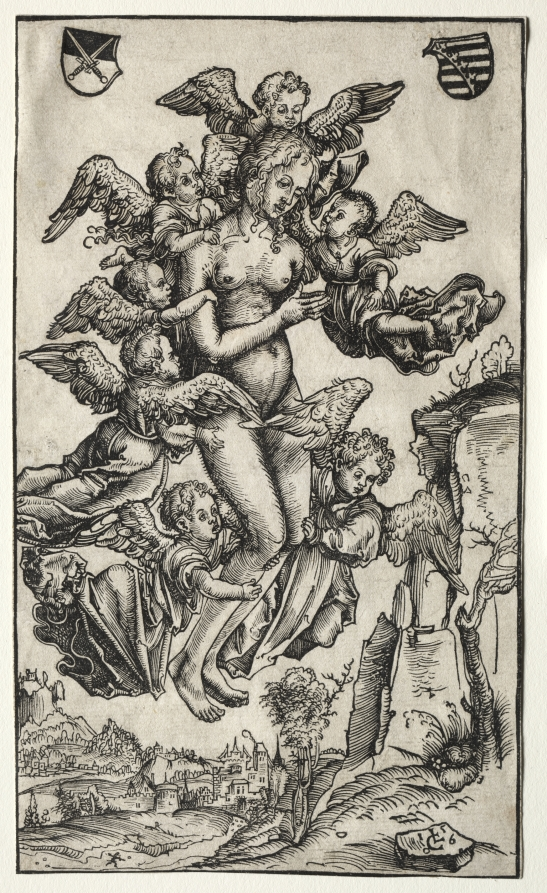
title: The Ecstasy of St. Mary Magdalene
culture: Germany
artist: Lucas Cranach (German, 1472–1553)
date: 1506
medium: woodcut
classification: Print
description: According to medieval legend, Mary Magdalene was a fallen woman until she devoted herself to Christ. During her ascetic life in the wilderness, angels raised her aloft seven times a day to hear the music of the heavenly host while her visions of paradise enhanced her radiance. Interested in reviving classical ideals, Renaissance artists such as Lucas Cranach the Elder gave Mary Magdalene a Venus-like body to personify her divine beauty